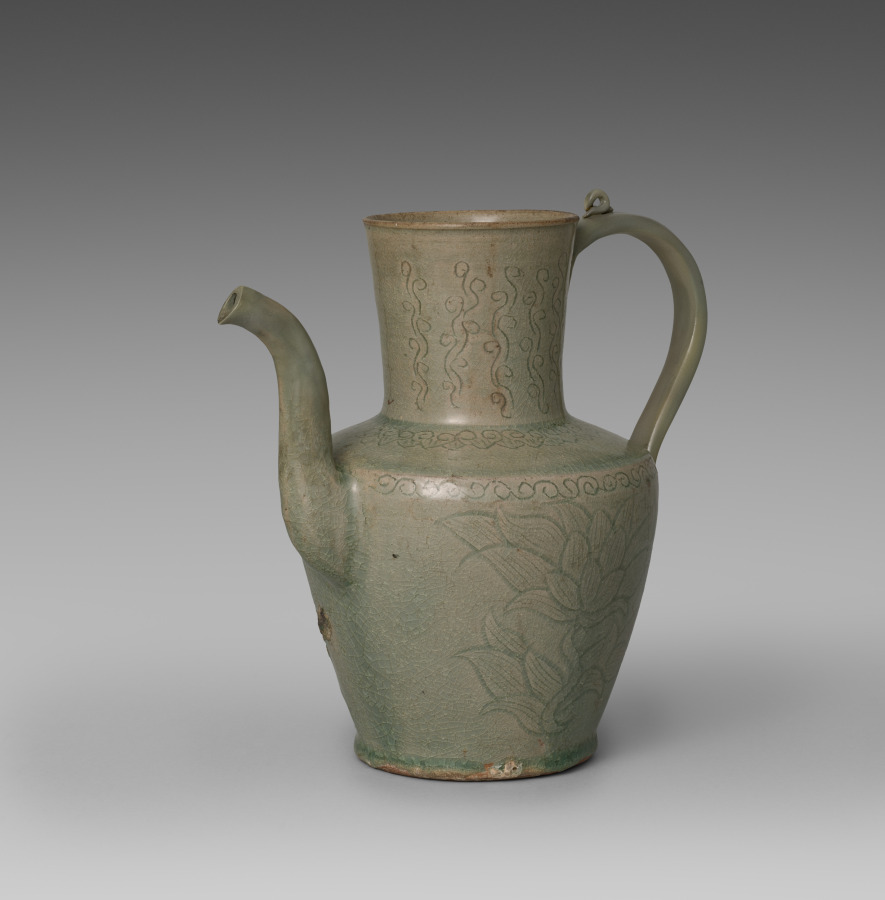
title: Wine Pot with Incised Lotus Design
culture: Korea, Goryeo dynasty (918–1392)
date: 918–1392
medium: celadon ware with incised and carved decoration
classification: Ceramic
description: As early as the seventh century, the practice of drinking tea and wine became an important part of elite culture in Korea. Elites of the Goryeo period commissioned a variety of types of utensils and vessels including this elegant wine pot with the incised image of lotus flowers, not only to make their drinking experience more exciting, but also to show their appreciation of nature.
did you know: A small loop on the handle was intended to secure the lid (now missing) on top of the pitcher through a cord or chain.